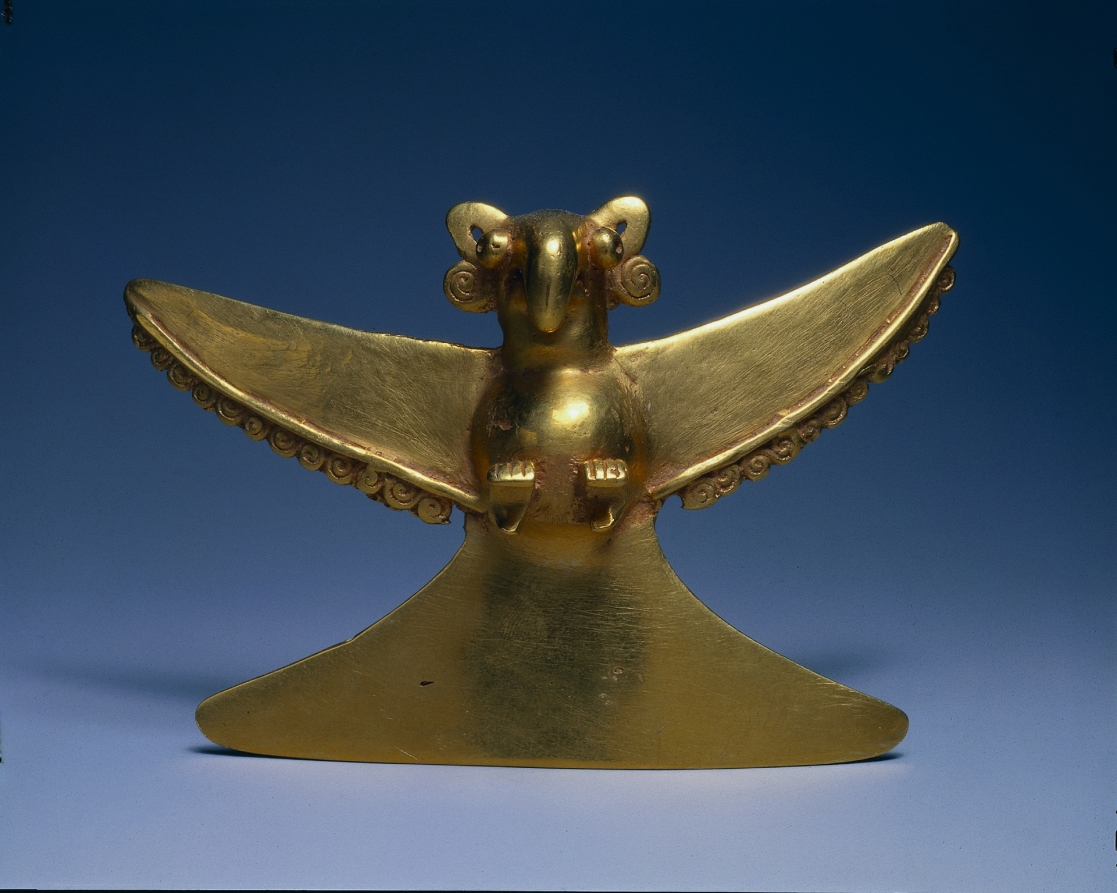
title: Eagle Pendant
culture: Western Panama, Veraguas-Gran Chiriquí Style, 11th-16th century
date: c. 1000–1550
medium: cast and hammered gold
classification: Metalwork